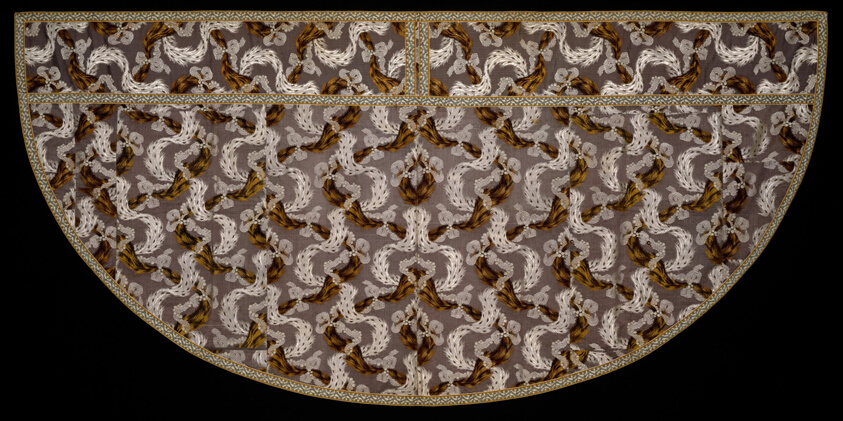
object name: Textile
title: Cope with Self-Orphrey Band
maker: France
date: c. 1765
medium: Silk and silk chenille yarns, plain weave with supplementary patterning warps and supplementary brocading wefts; edged with silk, plain weave with supplementary patterning warps tied by supplementary binding wefts and two-color supplementary pile warps, tied by supplementary binding wefts, forming uncut, voided velvet; lined with linen, plain weave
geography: France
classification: textile; liturgical; weaving